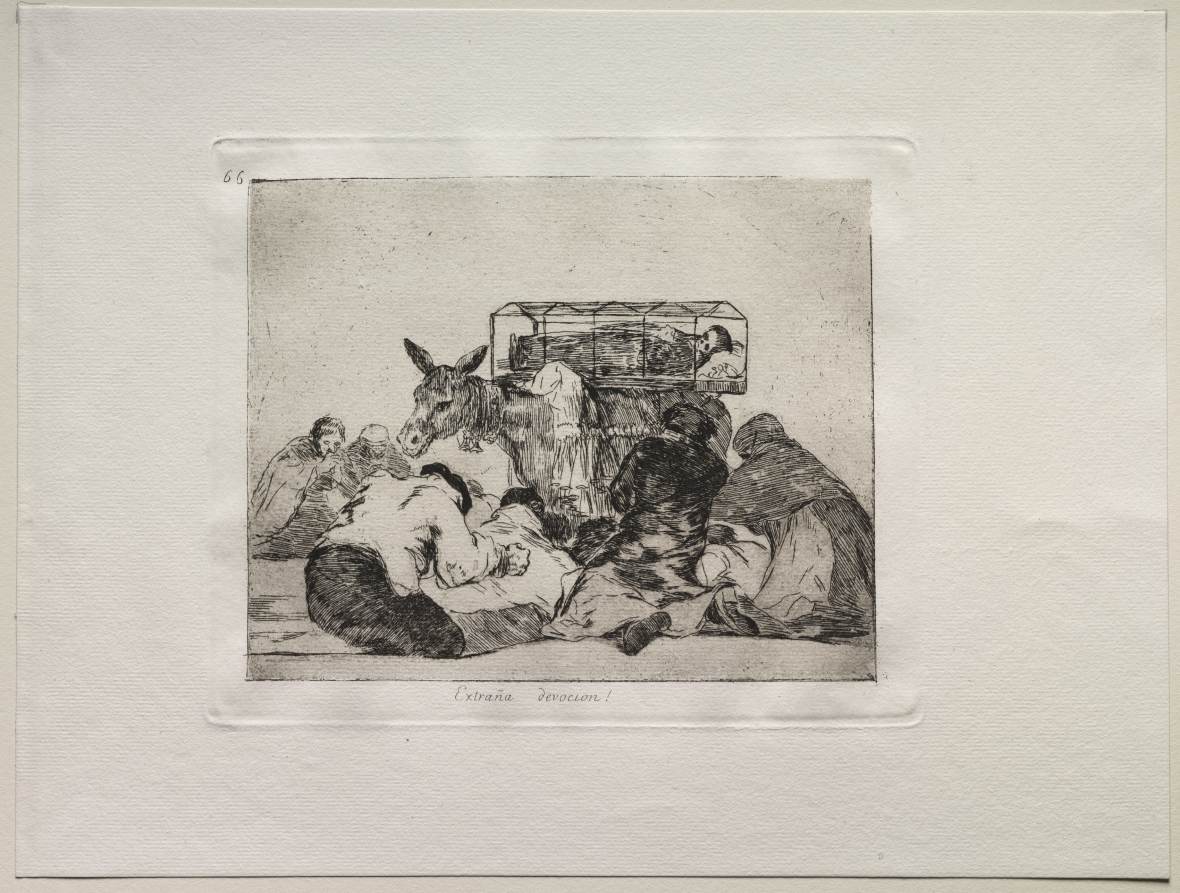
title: The Horrors of War: Strange Devotion!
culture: Spain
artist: Francisco de Goya (Spanish, 1746–1828)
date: 1810–20, published 1863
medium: etching and aquatint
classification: Print